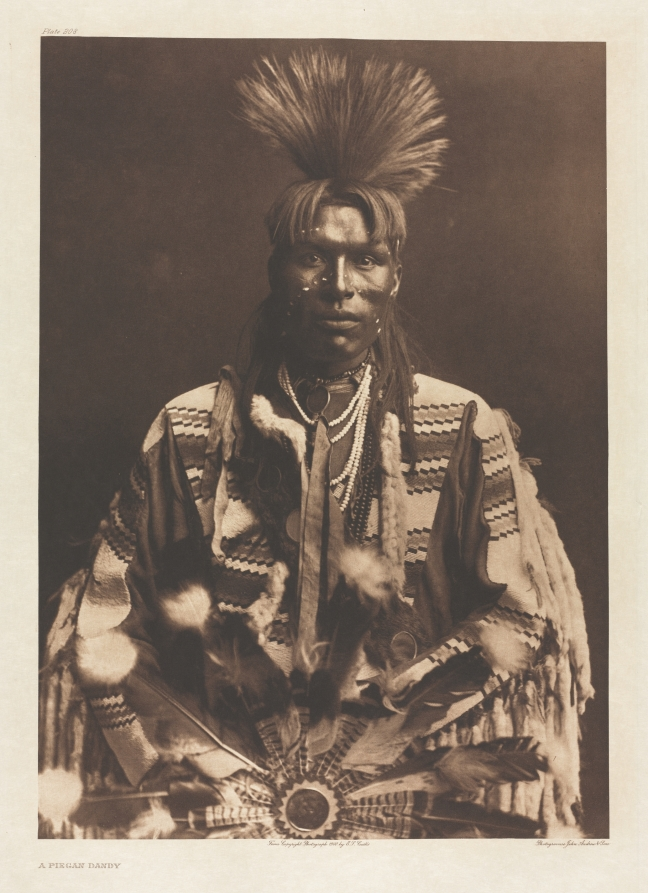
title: Portfolio VI, Plate 208: A Piegan Dandy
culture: America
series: The North American Indian: being a series of Portfolios picturing and describing the Indians of the United States, the Dominion of Canada, and Alaska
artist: Edward S. Curtis (American, 1868–1952)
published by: The University Press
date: 1900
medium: photogravure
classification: Portfolio